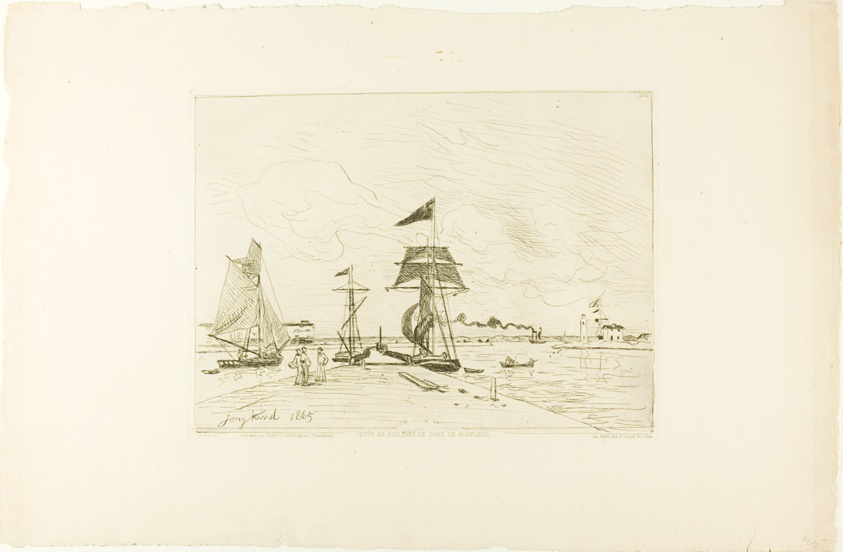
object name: Print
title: Wooden Pier, Honfleur Port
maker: Johan Barthold Jongkind (Dutch, 1819-1891)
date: 1865; published January 1866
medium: Etching on cream laid paper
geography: Holland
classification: etching; print; prints and drawing